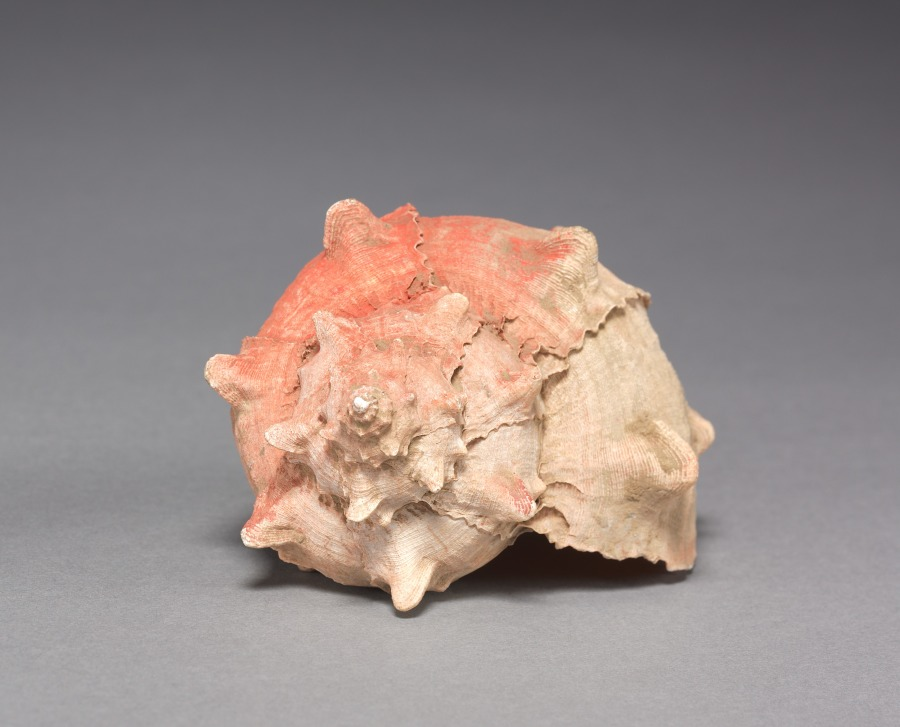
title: Offering Group: Large Shell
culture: Mexico, Guerrero(?), San Jerónimo de Juárez, Xochicalco style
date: c. 800–1200(?)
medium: shell, red pigment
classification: Sculpture